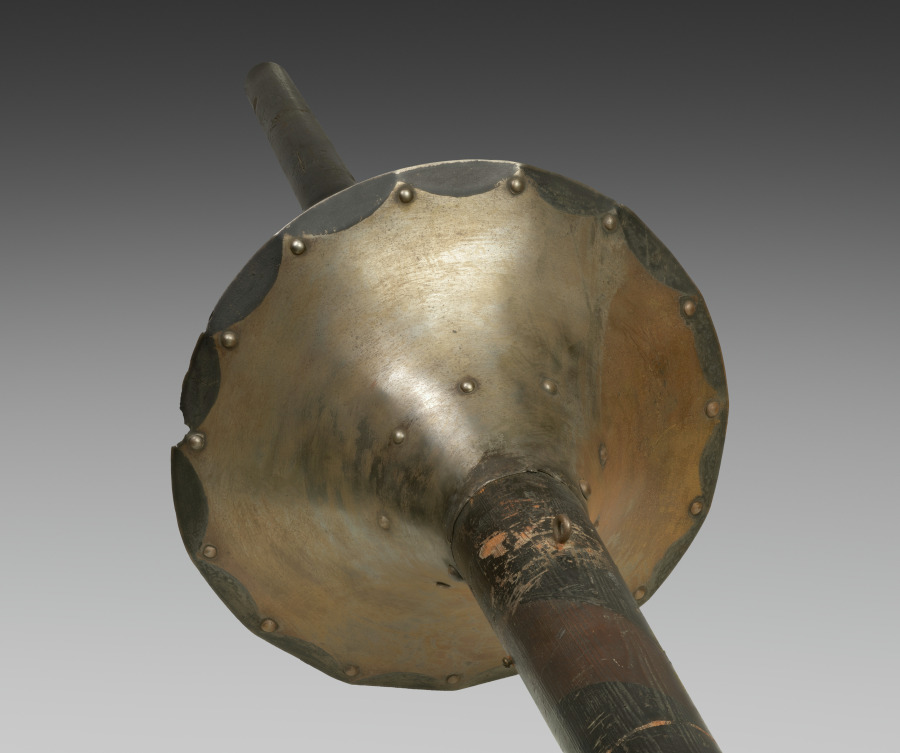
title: Tilting Lance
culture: Germany, late 19th-early 20th Century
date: c. 1875–1925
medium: steel and wood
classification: Arms and Armor